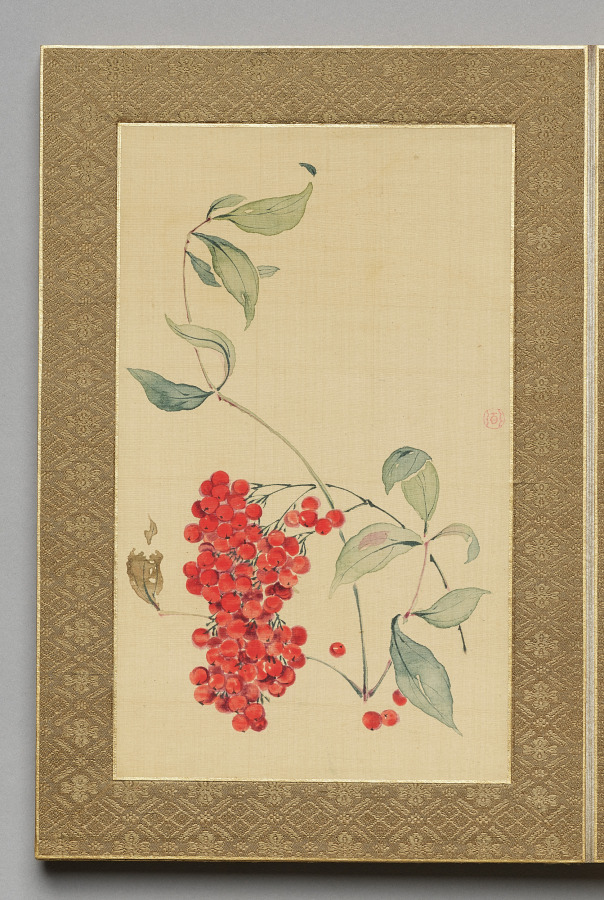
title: Painting from Flowers and Grasses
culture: Japan, Edo period (1615–1868)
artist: Tsubaki Chinzan (Japanese, 1801–1854)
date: 1841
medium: album; ink and color on silk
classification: Painting